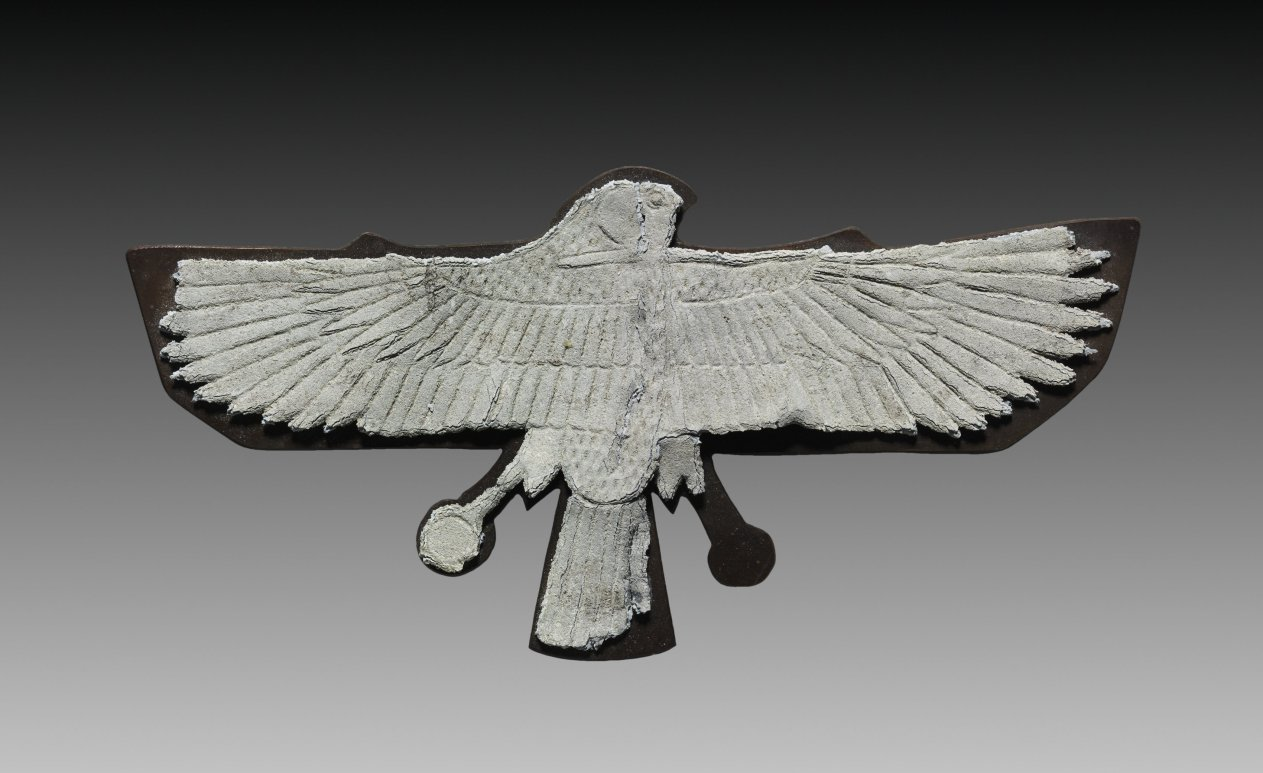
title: Falcon Breast Ornament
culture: Egypt, Third Intermediate (1069–715 BCE), Dynasties 21–22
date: 1000–900 BCE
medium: lead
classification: Amulets